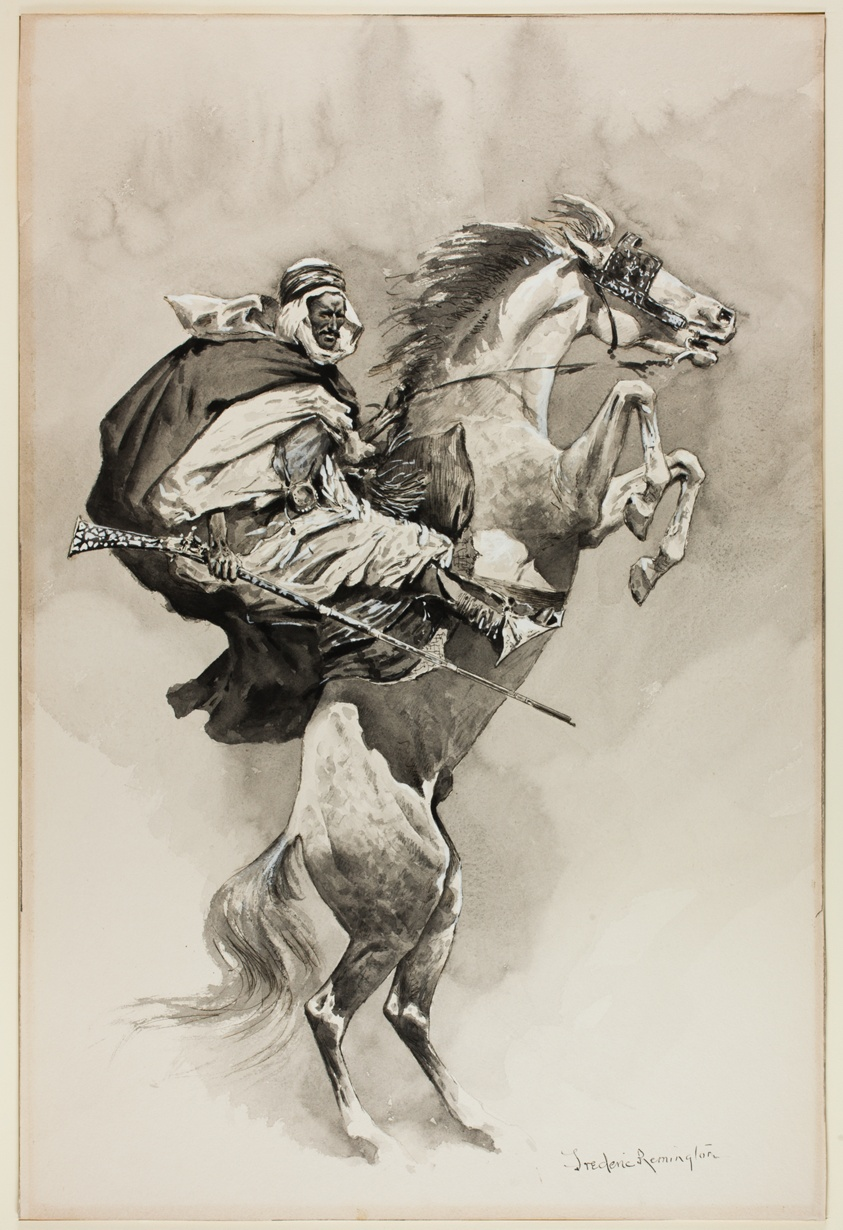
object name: Drawing and Watercolor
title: "As They Threw their Animals Back upon their Haunches," illustration for An Arabian Day and Night, in Harper's New Monthly Magazine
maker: Frederic Remington (American, 1861-1909)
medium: Brush and black gray wash heightened with white gouache over graphite, on cream laminate board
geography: United States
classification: ink or chalk wash; drawings (visual works); prints and drawing